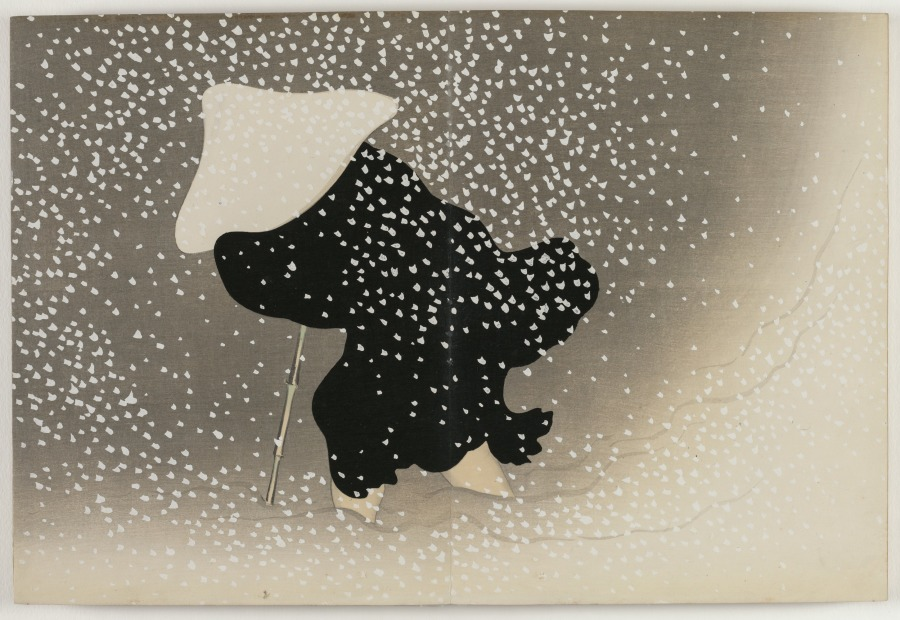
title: Flowers of a Hundred Worlds (Momoyogusa): Swirling Snow (Tomoe no yuki)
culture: Japan, Meiji period (1868–1912)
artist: Kamisaka Sekka (Japanese, 1866–1942)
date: 1909–10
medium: color woodcut with gold and silver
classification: Bound Volume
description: This print from a set of three woodblock printed albums displays the graphic design prowess of Kamisaka Sekka. The images were first distributed one by one to subscribers to the series but later were reissued in bound form, like this book, for mass consumers. Each print features a vignette taken from nature or Japanese literature. Many of the scenes have a long history in Japan, originating in the 900s or 1000s and having been interpreted by all manner of artists since that time. Sekka’s selections hew closely to precedents from the Rinpa style originated by painter Tawaraya Sōtatsu (c. 1570–c. 1640) and calligrapher Hon’ami Kōetsu (1558–1637).